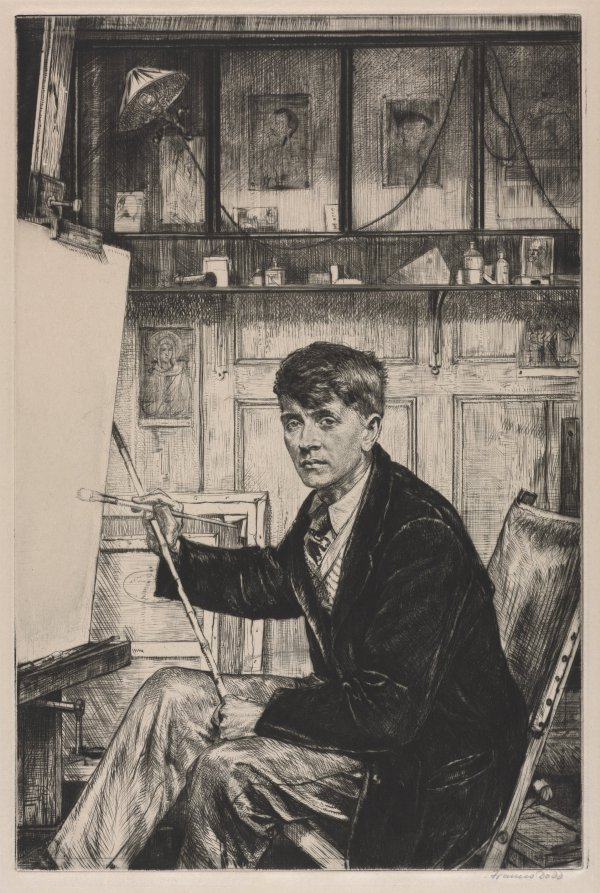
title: Charles Cundall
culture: England, 20th century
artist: Francis Dodd (British, 1874–1949)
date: 1926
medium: drypoint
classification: Print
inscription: signed lower right in pencil: Francis Dodd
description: Charles Cundall was a 20th-century British painter of genre scenes, sporting subjects, and landscapes.